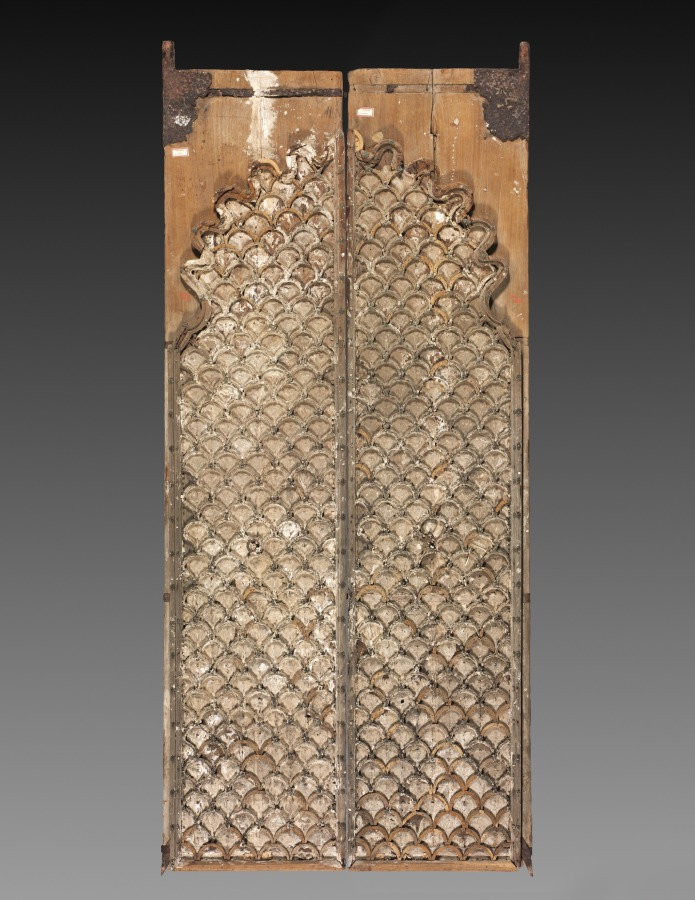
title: Pair of Painted Doors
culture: India, Bundi, 19th century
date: c. 1820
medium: color on wood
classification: Painting